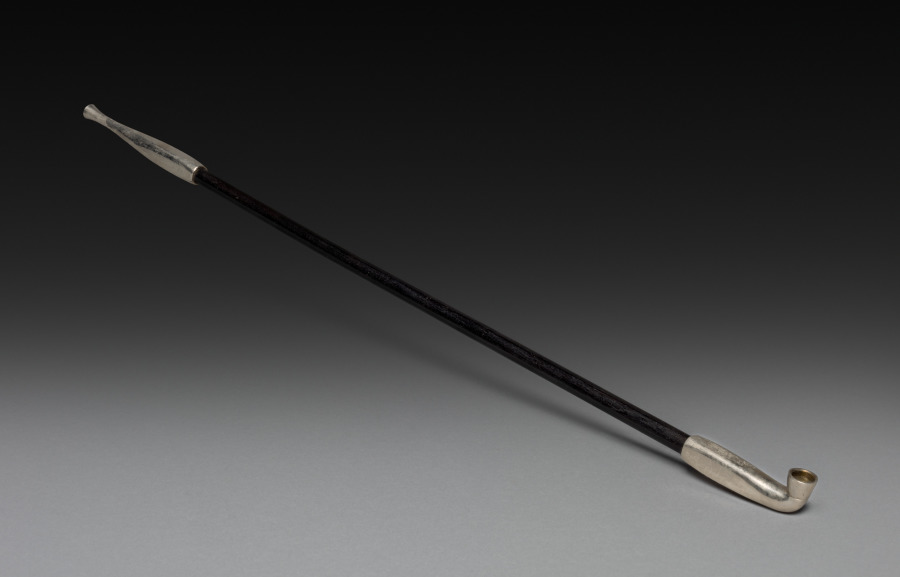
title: Tobacco Pipe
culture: Japan, Edo period (1615–1868)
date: early to mid-1800s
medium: wood and metal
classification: Miscellaneous